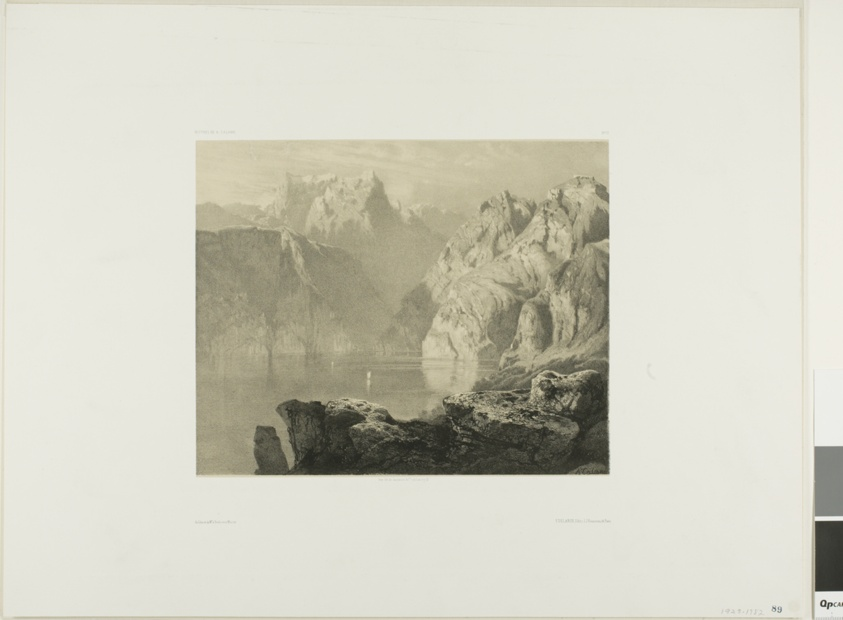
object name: Print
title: Vier Waldstaettersee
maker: Alexandre Calame (Swiss, 1810-1864)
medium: Lithograph on paper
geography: Switzerland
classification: lithograph; print; prints and drawing